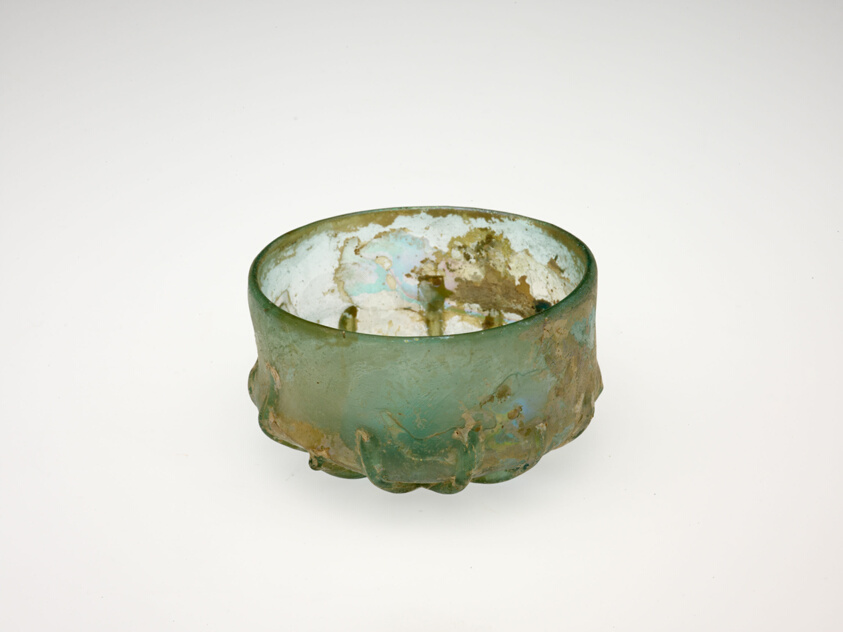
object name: Vessel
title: Bowl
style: syrian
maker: Roman or Byzantine; Eastern Mediterranean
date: 1st-5th century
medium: Glass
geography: Syria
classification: bowl; glass; vessel; ancient art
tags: bowl